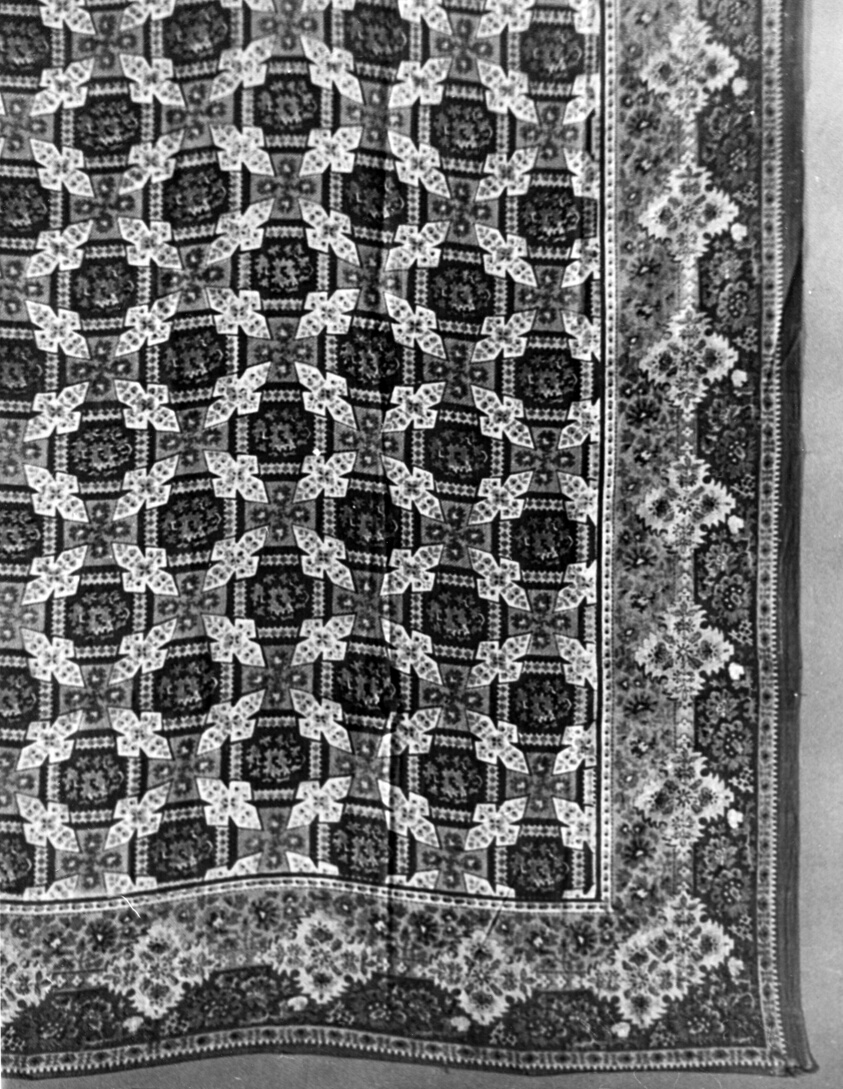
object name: Textile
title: Handkerchief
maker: France, Alsace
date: c. 1830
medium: Cotton, plain weave; printed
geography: France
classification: textile; weaving - printed; accessories (object genre)